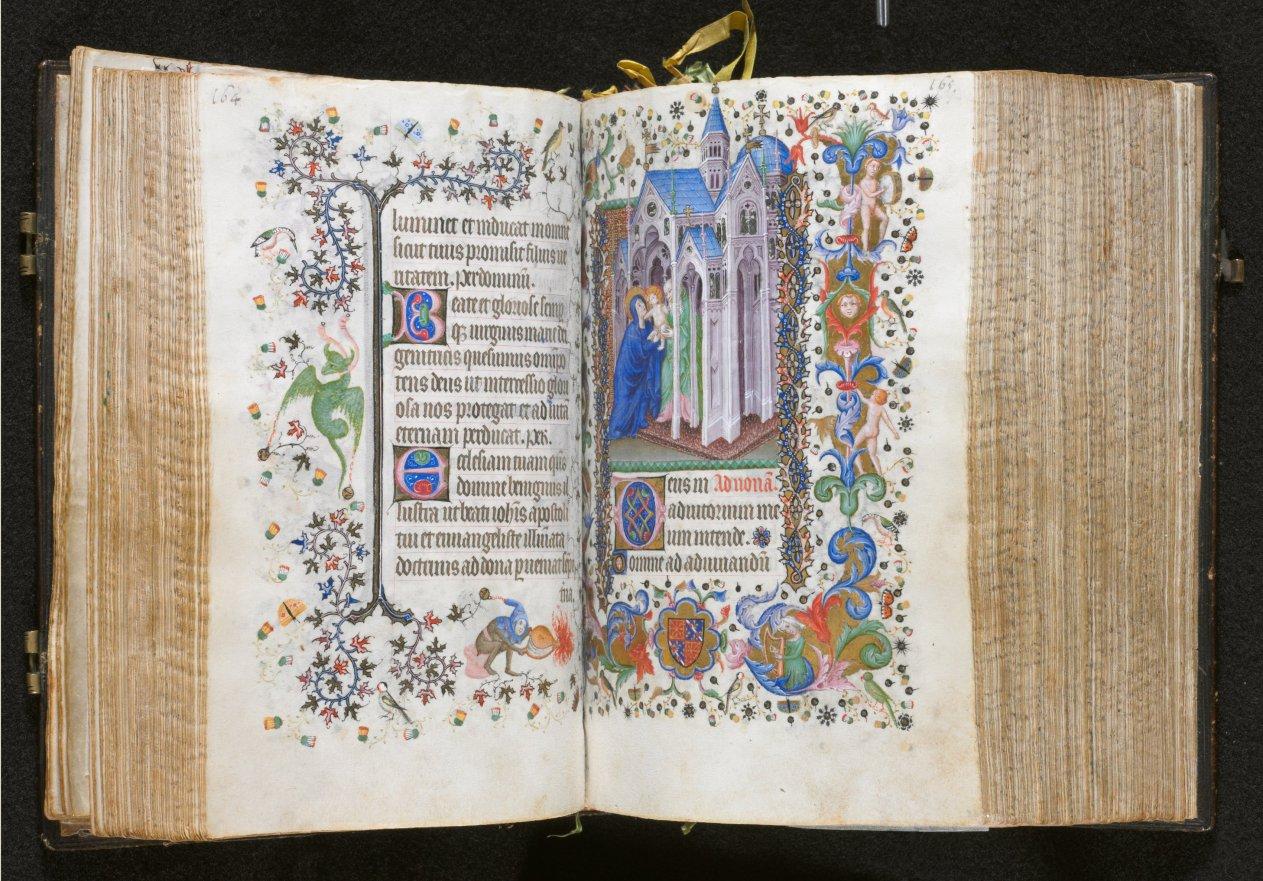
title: Hours of Charles the Noble, King of Navarre (1361-1425): fol. 82v, Text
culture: France, Paris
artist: Master of the Brussels Initials and Associates (French)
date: c. 1405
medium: ink, tempera, and gold on vellum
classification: Bound Volume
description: This precious volume was obviously highly prized by its owner, the French-born King of Navarre, who had his coat of arms painted on no less than twenty folios. Rather than directly commissioning this manuscript from a specific workshop, it seems that Charles the Noble acquired his book of hours -- perhaps ready-made for the luxury market -- while on a trip to Paris in 1404-05. A collaborative effort, six painting styles are evidenced within the pages of this codex, those of two Italians, two Frenchmen, and two Netherlanders. The painter who was responsible for the planning and decoration of the book, and who produced seventeen of the large miniatures, was a Bolognese artist known as the Master of the Brussels Initials. His principal assistant, responsible for most of the borders, was a Florentine who signed his name "Zecho" da Firenze on folio 208 verso.